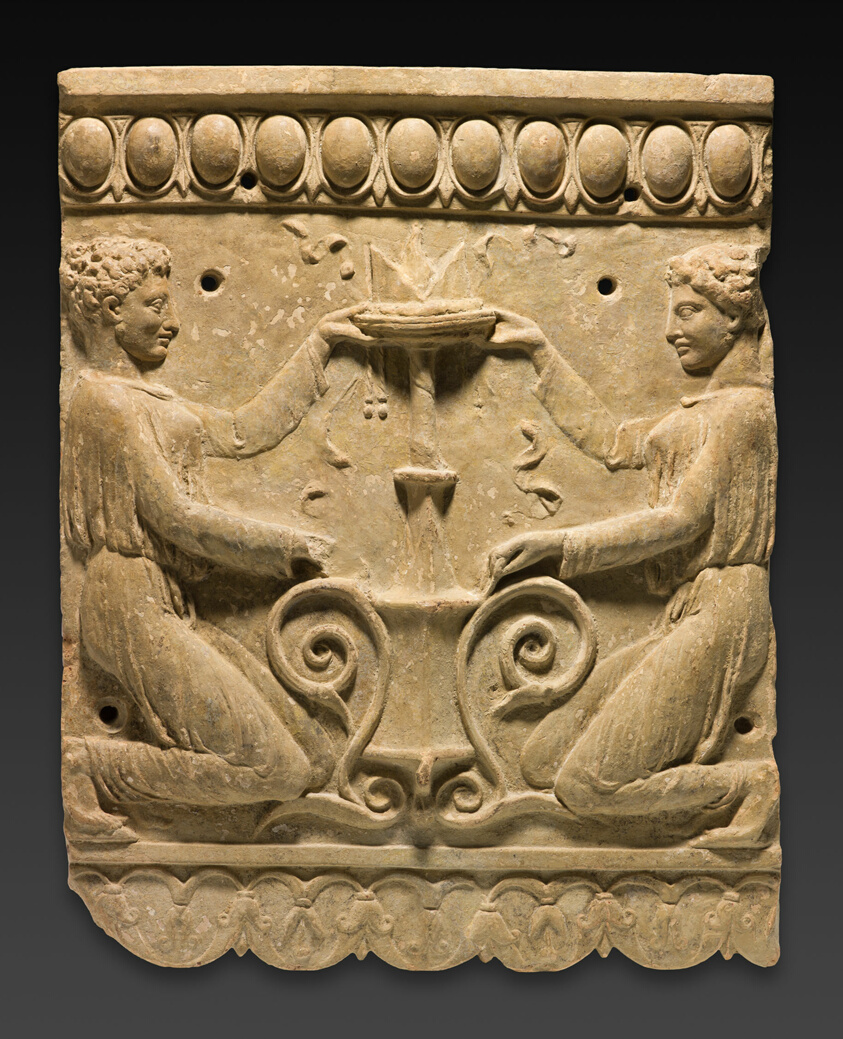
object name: Architectural fragment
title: Relief Plaque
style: imperial (roman)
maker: Roman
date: Early 1st century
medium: terracotta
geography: Rome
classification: earthenware; ceramics; sculpture; ancient art; architectural fragment